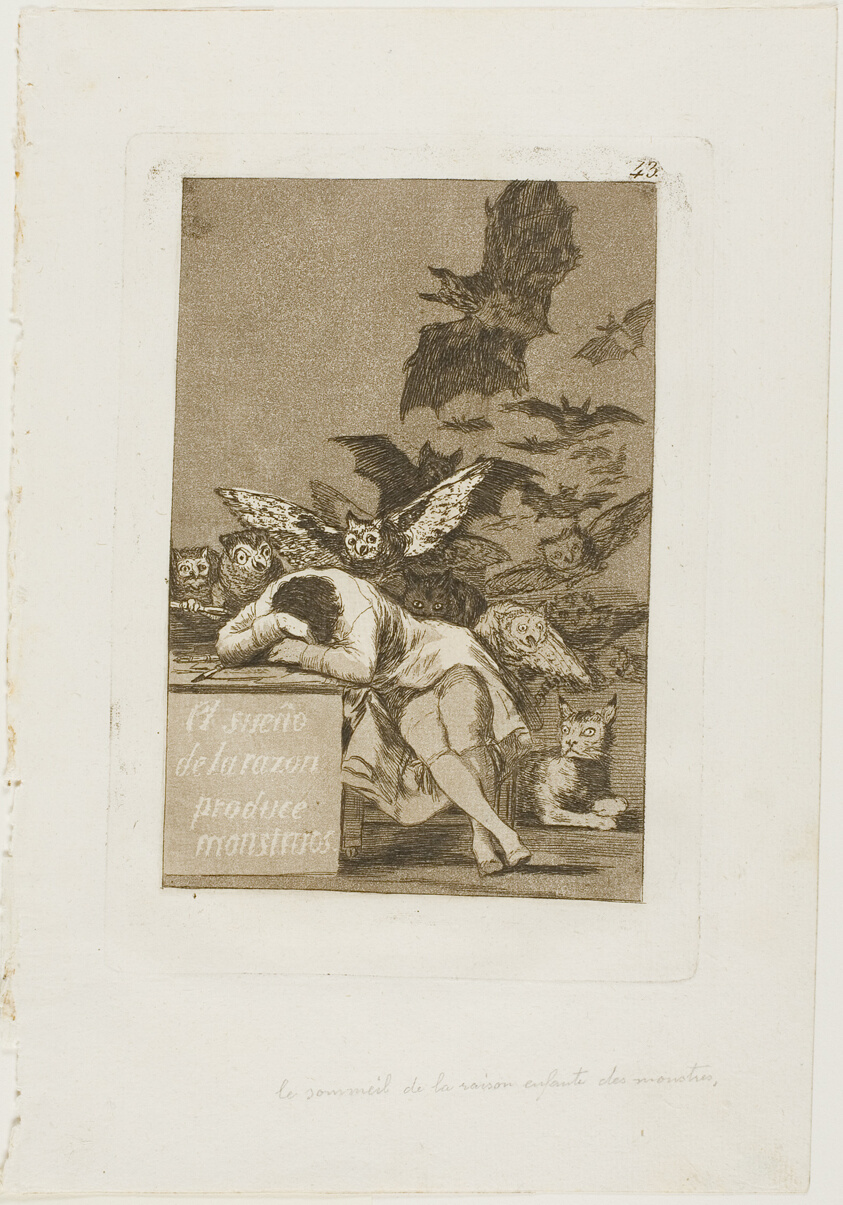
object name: Print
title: The Sleep of Reason Produces Monsters, plate 43 from Los Caprichos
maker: Francisco José de Goya y Lucientes (Spanish, 1746-1828)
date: 1797/99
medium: Etching and aquatint on ivory laid paper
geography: Spain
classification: etching; print; prints and drawing